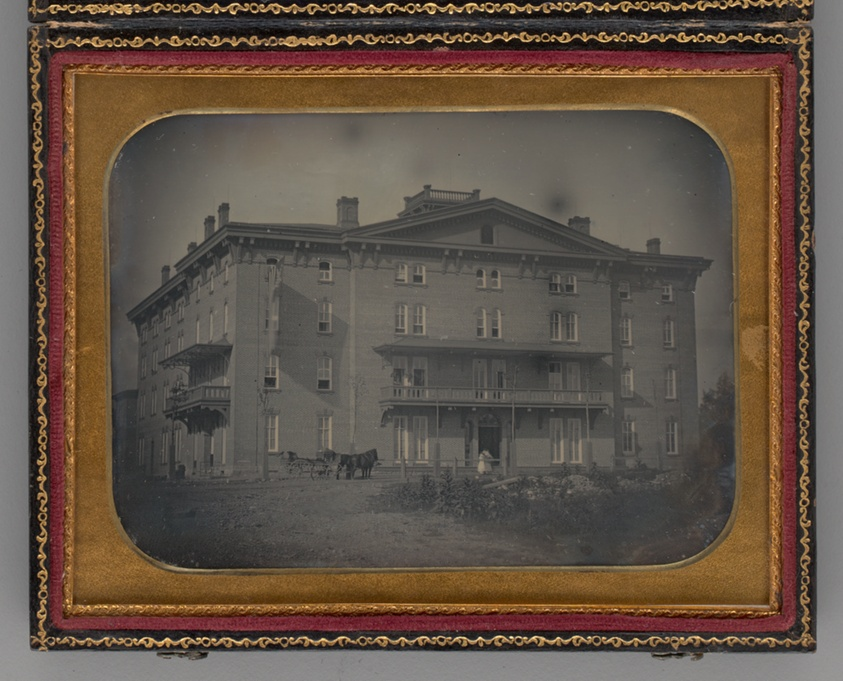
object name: Photograph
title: Untitled (Wyoming House Hotel, Scranton, PA)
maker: Unknown maker; American, 19th century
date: 1852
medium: Daguerreotype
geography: United States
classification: portrait; daguerreotype; photograph; photography; portrait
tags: lundberg collection, buildings, hotels, houses, urban life